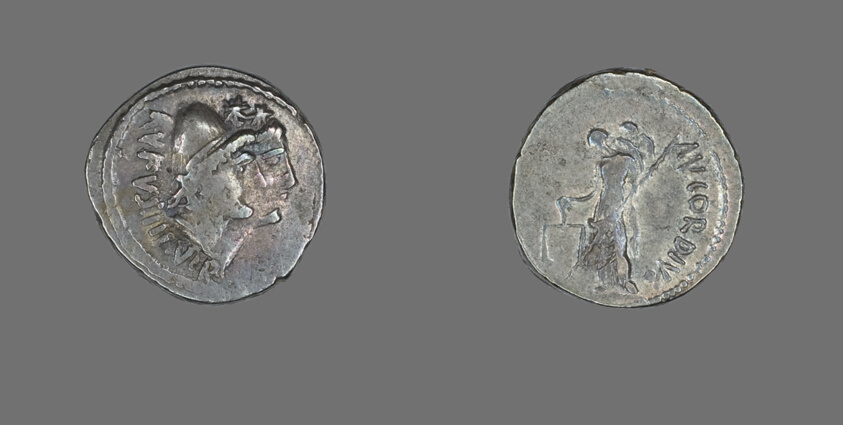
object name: Coin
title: Denarius (Coin) Depicting the Dioscuri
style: roman (ancient, style or period), ancient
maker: Roman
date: 49 BCE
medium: Silver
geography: Roman Empire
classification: coin; ancient art